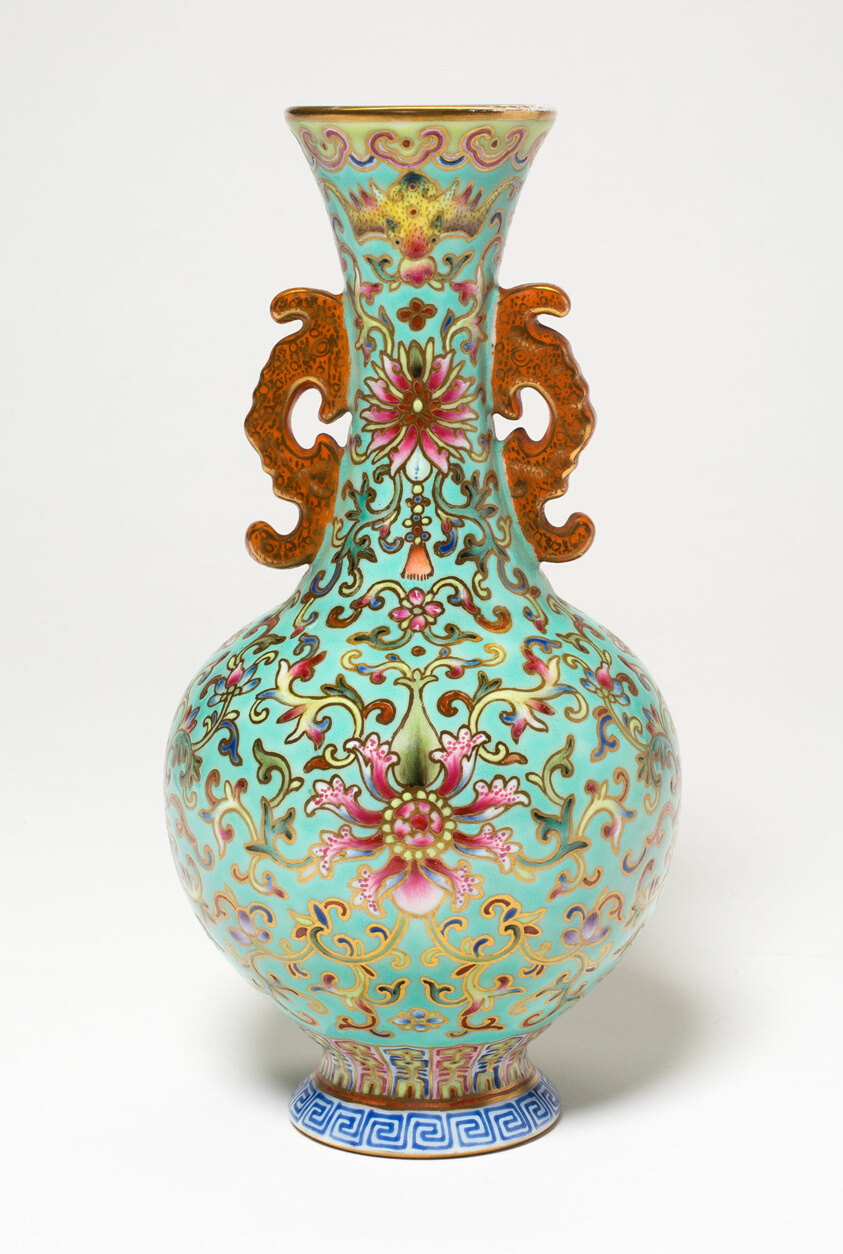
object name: Vessel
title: Vase with Dragon-Shaped Handles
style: Chinese (culture or style)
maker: China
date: Qing dynasty (1644–1911), Qianlong reign mark and period (1736–1795), probably late 18th century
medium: Porcelain painted in overglaze enamels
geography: China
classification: vase; porcelain; vessel; asian art; ceramics